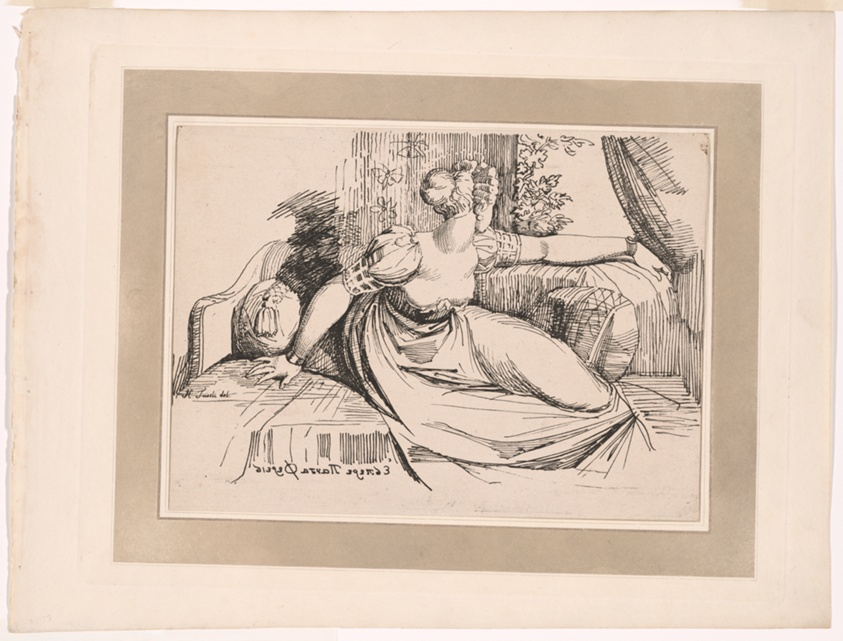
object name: Print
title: A Woman Sitting by the Window (“Evening Thou Bringest All”), from the first issue of Specimens of Polyautography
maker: Henry Fuseli (Swiss, active in England, 1741-1825); published by Philipp André (German, active London, 1800–1805); and James Heath (British, 1757–1834)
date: 1802, published 1803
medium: Lithograph in black on cream wove paper, tipped onto mount with aquatint border in gray on cream wove paper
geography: United Kingdom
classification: lithograph; print; prints and drawing; paper